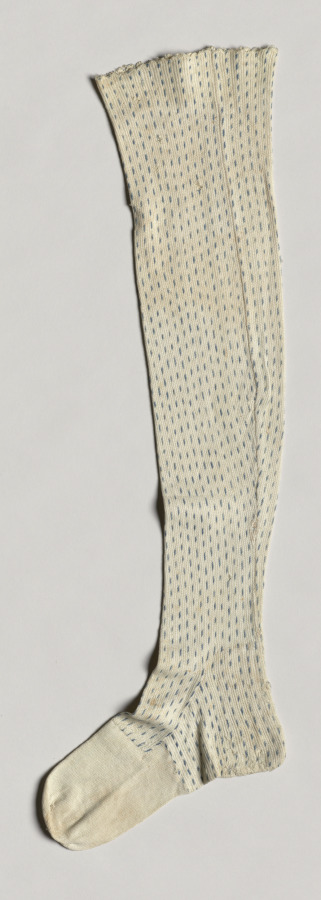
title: Stocking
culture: America, New York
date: 1790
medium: knitting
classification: Knitting